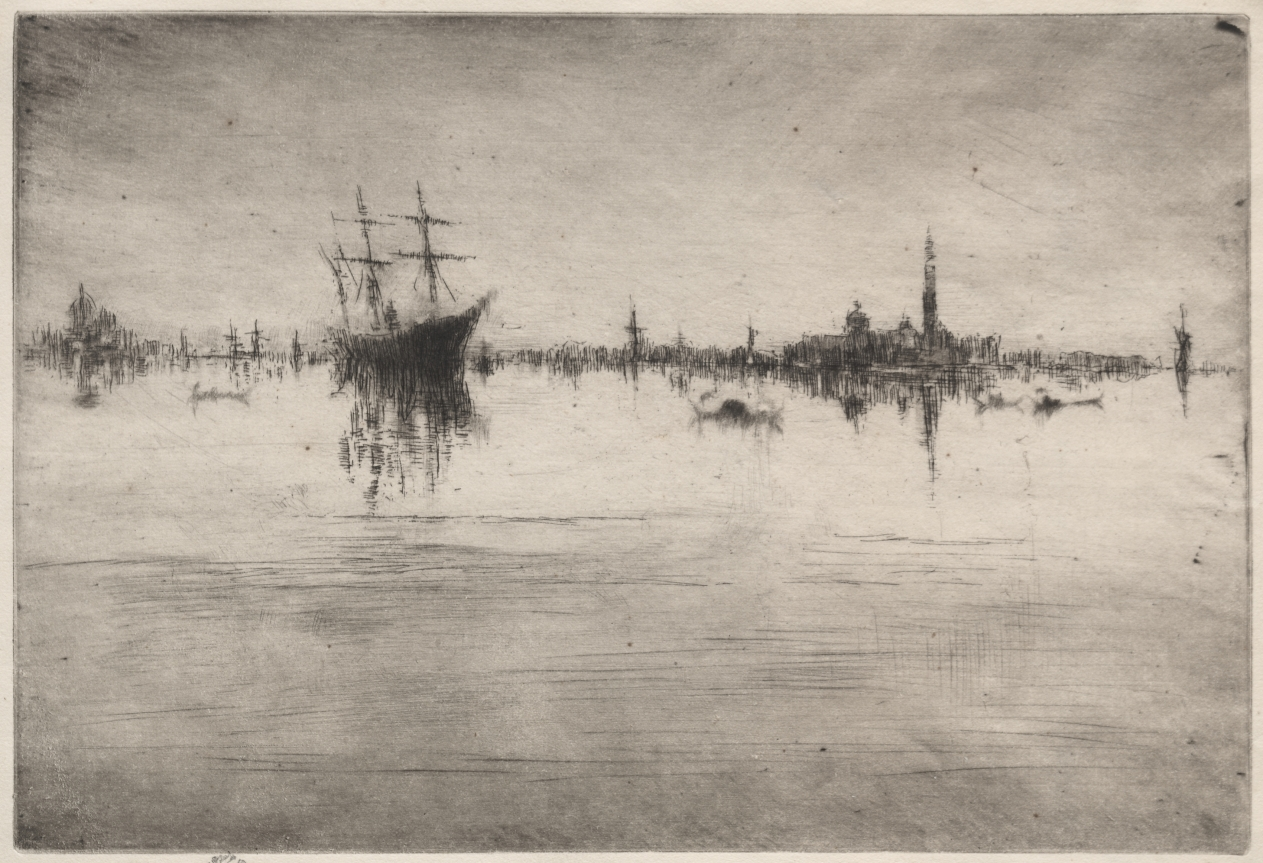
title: Nocturne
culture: America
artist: James McNeill Whistler (American, 1834–1903)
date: 1879–1880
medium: etching and drypoint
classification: Print